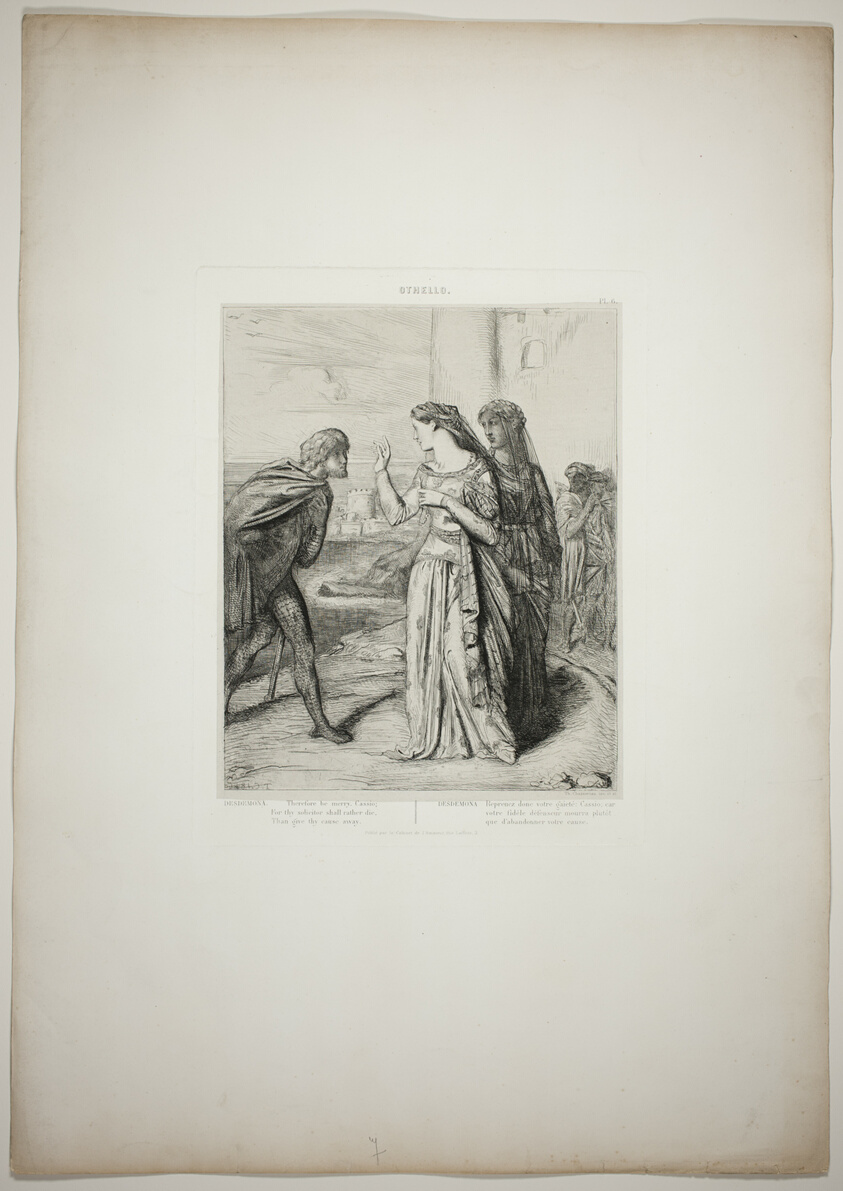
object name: Print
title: Therefore be merry, Cassio, plate six from Othello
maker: Théodore Chassériau (French, 1819-1856)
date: 1844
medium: Etching, engraving, roulette, and drypoint on paper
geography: France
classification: etching; print; prints and drawing